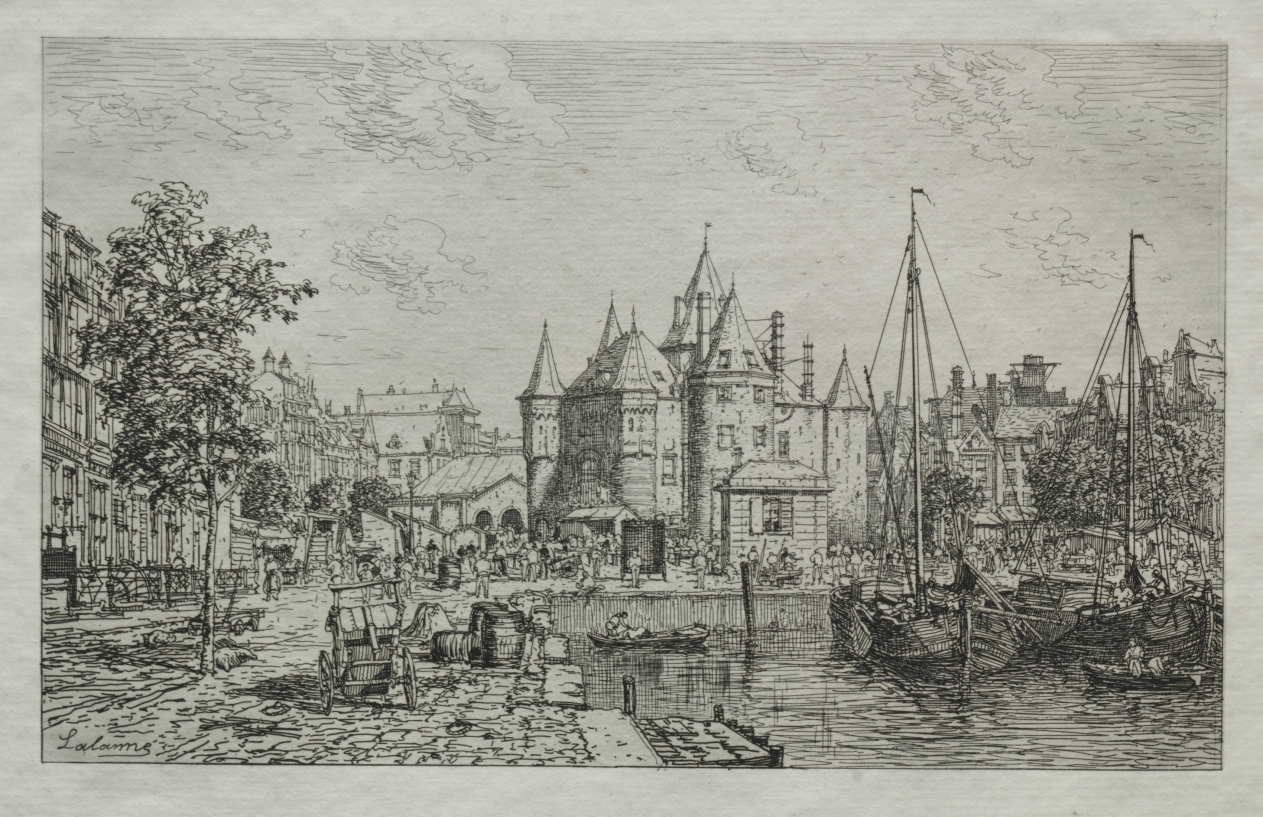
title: The Wagg-Poids of the City of Amsterdam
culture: France, 19th century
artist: Maxime Lalanne (French, 1827–1886)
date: 1879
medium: etching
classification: Print